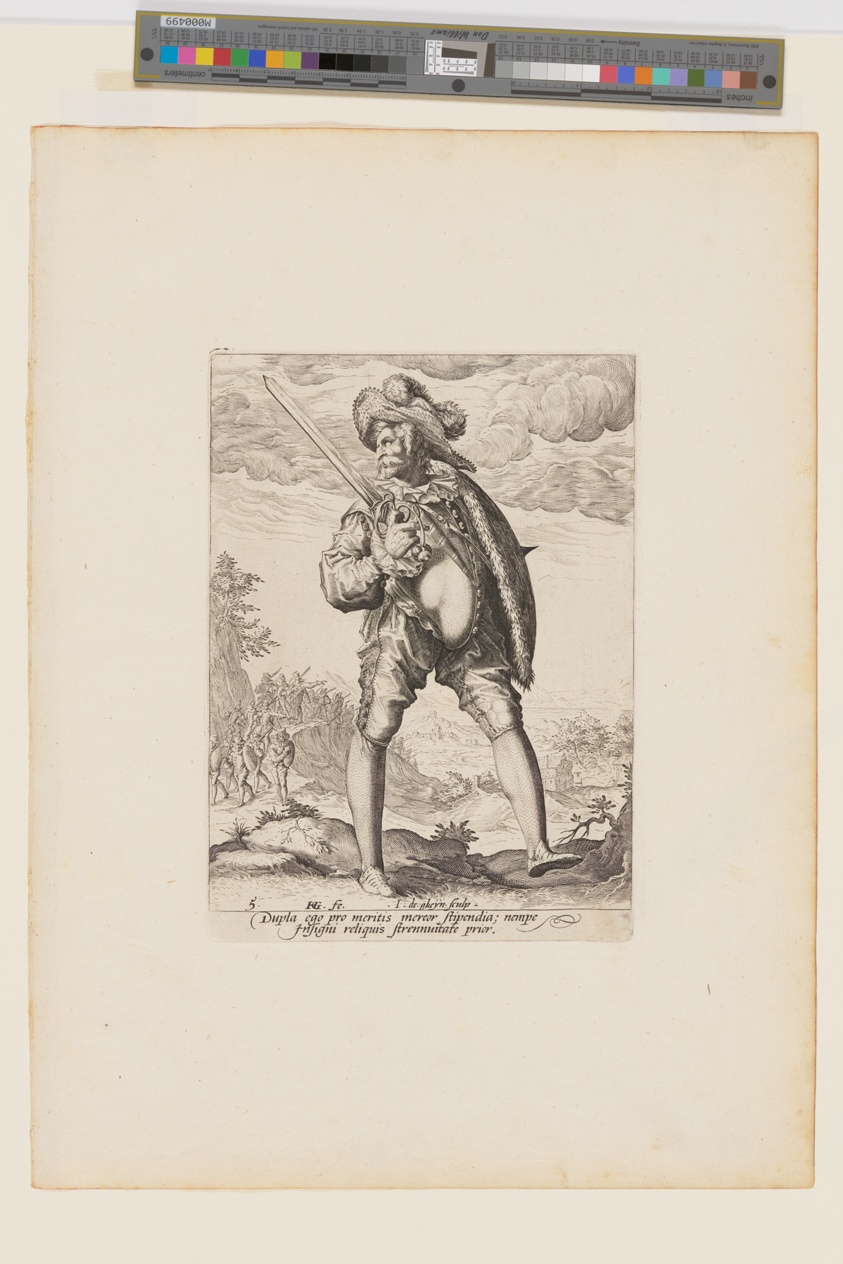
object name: Print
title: Soldier, Armed with Broadsword and Shield, from Officers and Soldiers of the Bodyguard of Emperor Rudolph II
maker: Jacques de Gheyn II (Dutch, 1565–1629); after Hendrick Goltzius (Dutch, 1558–1617)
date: 1587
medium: Engraving on ivory laid paper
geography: Netherlands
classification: engraving; paper; print; prints and drawing